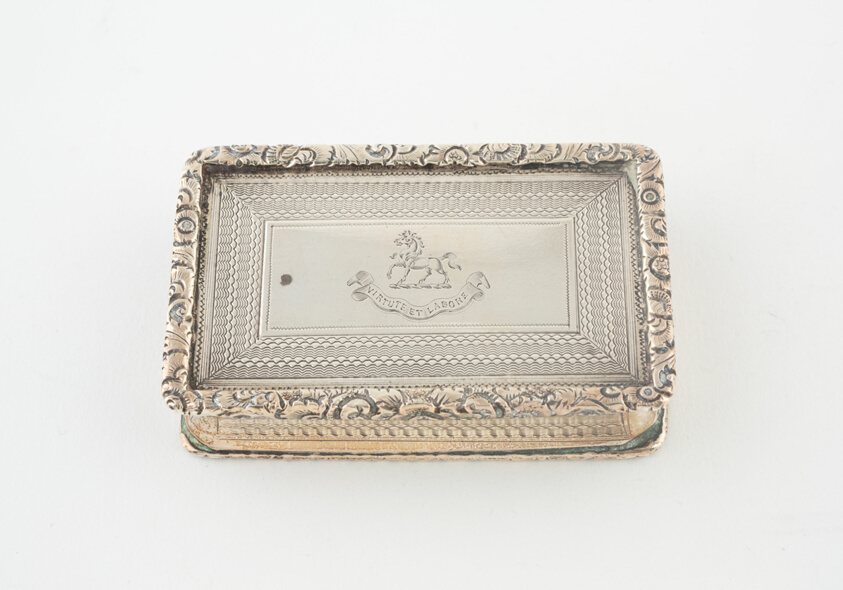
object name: Metalwork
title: Snuffbox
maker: George Unite; Birmingham, England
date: c. 1898/99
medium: Silver and silver gilt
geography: Birmingham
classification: container for personal use; european decorative arts; metalwork; silver; decorative object/ornament